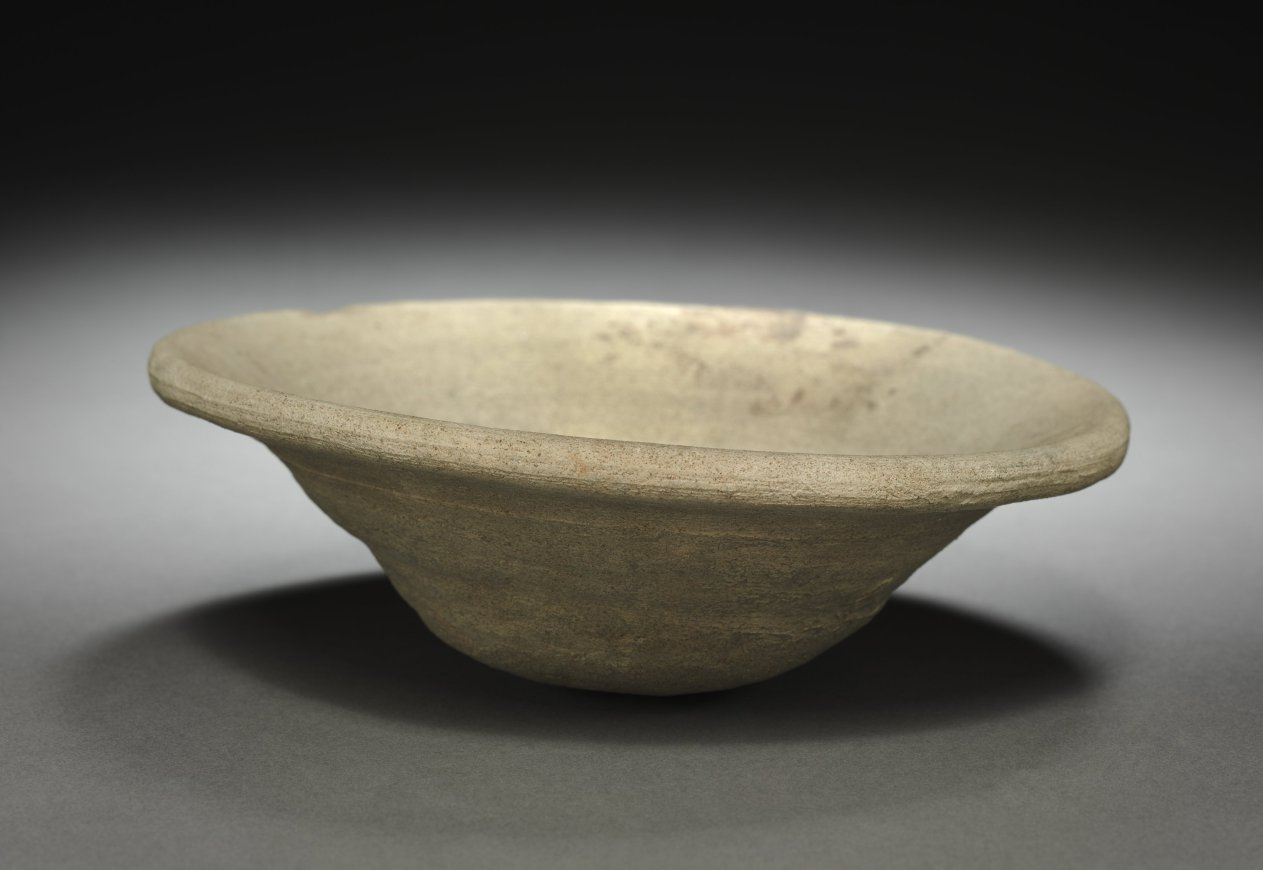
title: Bowl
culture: Iran, Sasanian Empire (224–651 CE)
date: 222–650 CE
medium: earthenware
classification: Ceramic